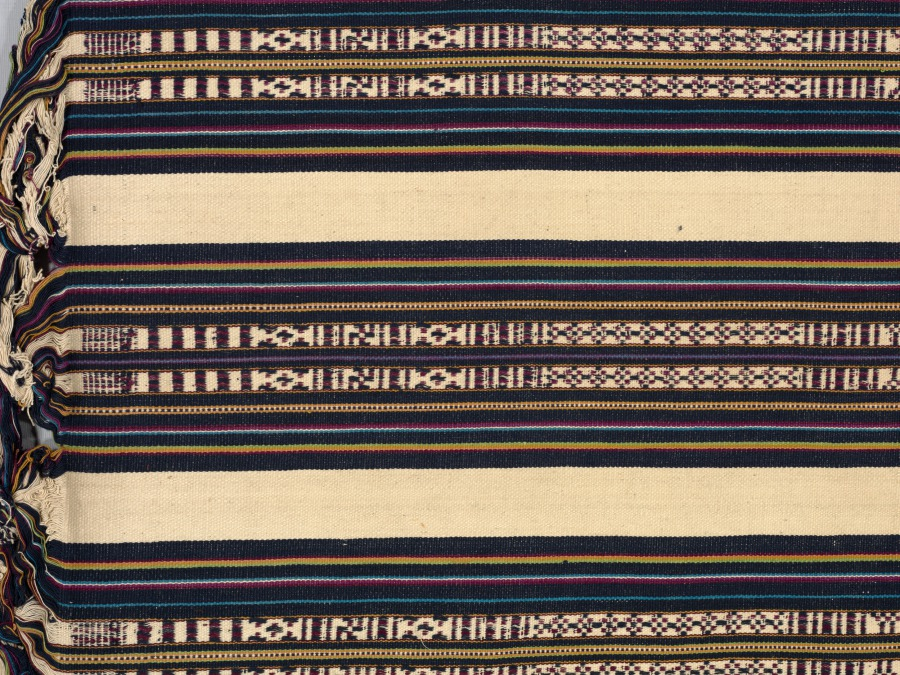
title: Textile Hanging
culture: Tibet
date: 1900–1915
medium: wool and cotton: warp faced plain weave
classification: Textile